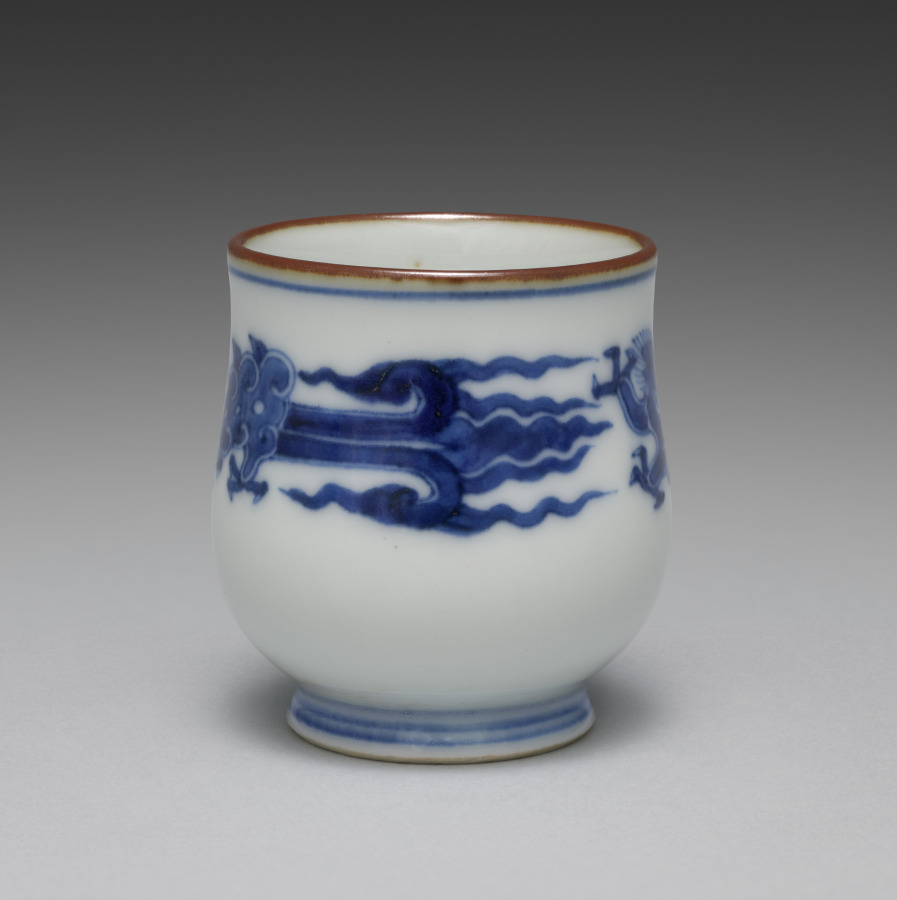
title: Cup from Sake Cups with Dragons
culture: Japan, Meiji period (1868–1912)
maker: Seifū Yohei III (Japanese, 1851–1914)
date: c. 1893–1914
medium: One from a set of six sake cups; porcelain with underglaze blue and iron oxide rims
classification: Ceramic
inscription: 大日本清風造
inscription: 清風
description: Each of these sake cups pictures two backward-looking dragons. The highly stylized creatures resemble jade carvings.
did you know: Seifū Yohei III was inspired by the Chinese mythical animals that were common on porcelain objects made at Jingdezhen in China during the Ming dynasty (1368–1644) and then exported around the world.